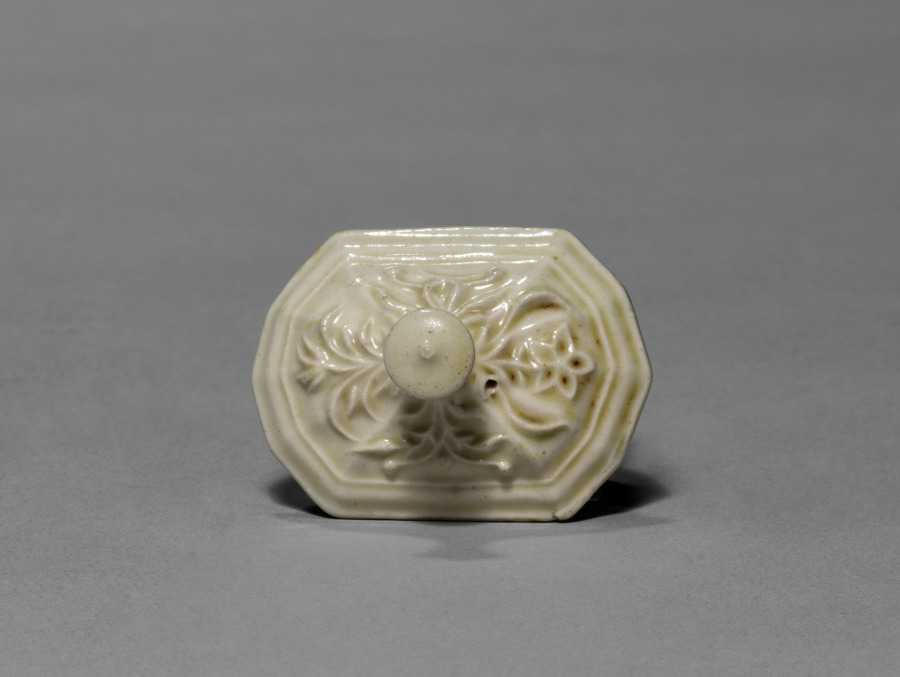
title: Teapot (lid)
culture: England, Staffordshire, 18th century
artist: Staffordshire Factory (British)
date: c. 1745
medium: salt-glaze earthenware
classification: Ceramic